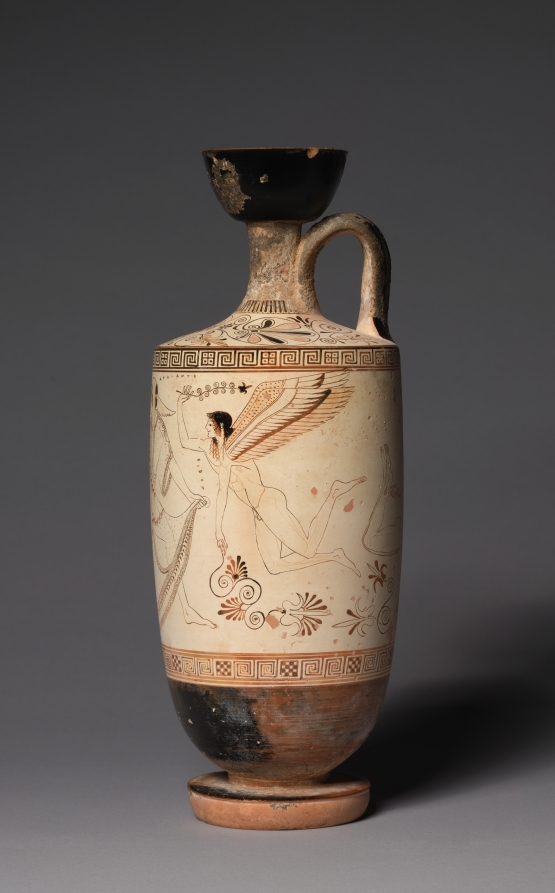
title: White-Ground Lekythos (Oil Vessel): Atalanta and Erotes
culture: Greek, Attic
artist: attributed to Douris (Greek, Attic, active c. 500–470 BCE)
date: 500–490 BCE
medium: ceramic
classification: Ceramic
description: Known as "white-ground" because of the white clay slip applied as a surface for figural decoration, vases of this type give some idea of the appearance of lost ancient large-scale wall paintings. Both remarkably well preserved and masterfully composed, the images cover the entire circumference of the vase. At the center, Atalanta, the virgin huntress renowned for both her speed and her opposition to marriage, races to the right while looking back at Eros, the winged god of love; both figures are named. This Eros, bounding forward, tries to crown her, while two additional Erotes (also named) further hem her in. Love will win.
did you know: Eros, god of love, appears three times on this vase.